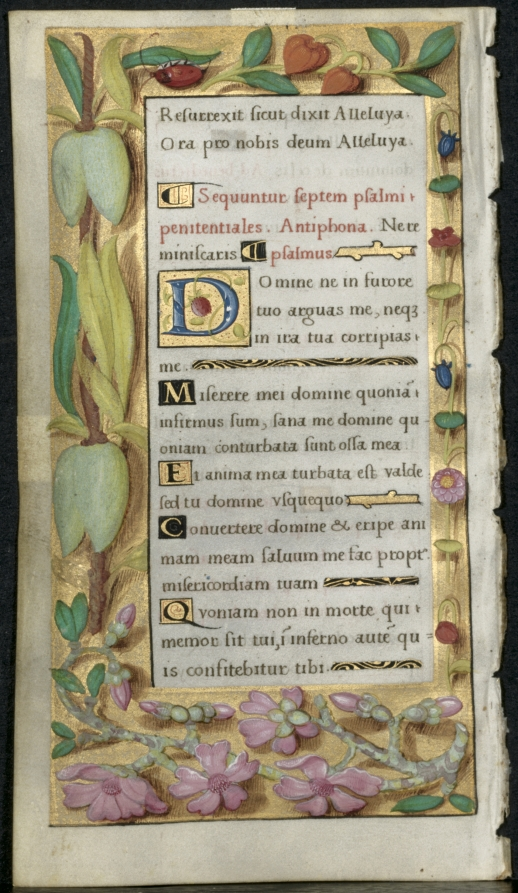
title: Leaf from a Book of Hours: Penitential Psalms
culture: France, 16th century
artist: Noël Bellemare (French, d. 1546)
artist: The 1520s Hours Workshop (French)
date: c. 1530–1535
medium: ink, tempera and liquid gold on vellum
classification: Manuscript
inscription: Resurrexit, sicut dixit, alleluia: Ora pro nobis Deum, alleluia. Sequuntur septem pfalmi penitentiales. Antiphona. Ne reminiscaris. psalmus: Domine , ne in durore tuo arguas me Miserere mei domine quoniam infirmus sum : sana me domine, quoniam conturbata sunt ossa mea Et anima mea turbata est valde : sed tu domine usquequo Convertere domine et eripe animam meam : salvum me fac propter misericordiam tuam. Quoniam non est in morte qui memor sit tui : in inferno autem quis confitebitur tibi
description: The 1520s Hours Workshop produced luxury books of hours for a wealthy, often royal, clientele. Recent evidence points to Paris as the site of the workshop’s activity under the direction of Antwerp-born miniaturist Noël Bellemare (died 1546). Containing fuschia pinks and bright acid greens, the palette is unusual in French manuscript painting of the period. Instead, Bellemare’s miniatures point directly to Antwerp painting at the time.